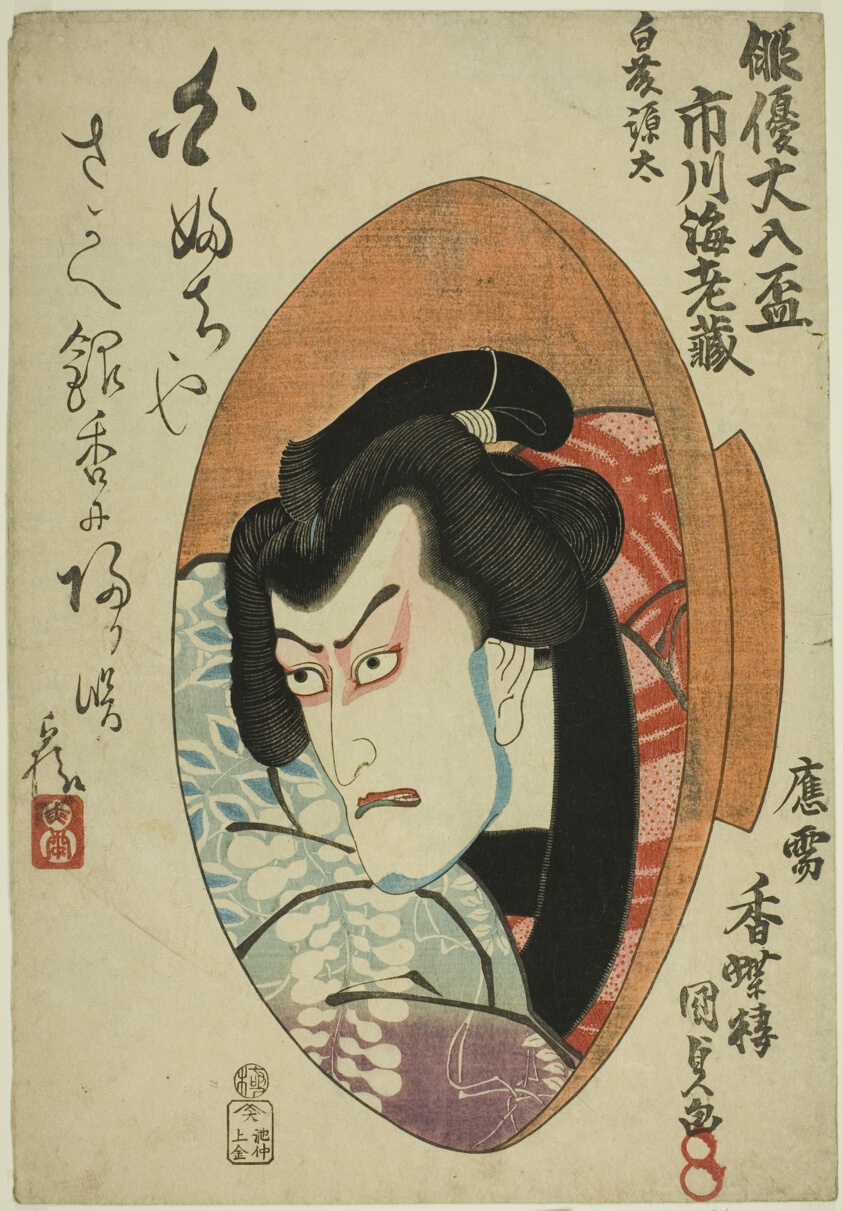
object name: Print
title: The actor Ichikawa Danjuro VII (Ebizo V) as Shirafuji Genta in the play "Sono Uwasa Sakura no Irodoki," from the series "Yakusha oiri sakazuki"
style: Japanese (culture or style)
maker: Utagawa Kunisada I (Toyokuni III) (Japanese, 1786-1864)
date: 1825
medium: Color woodblock print; oban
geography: Japan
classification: woodblock print; print; asian art